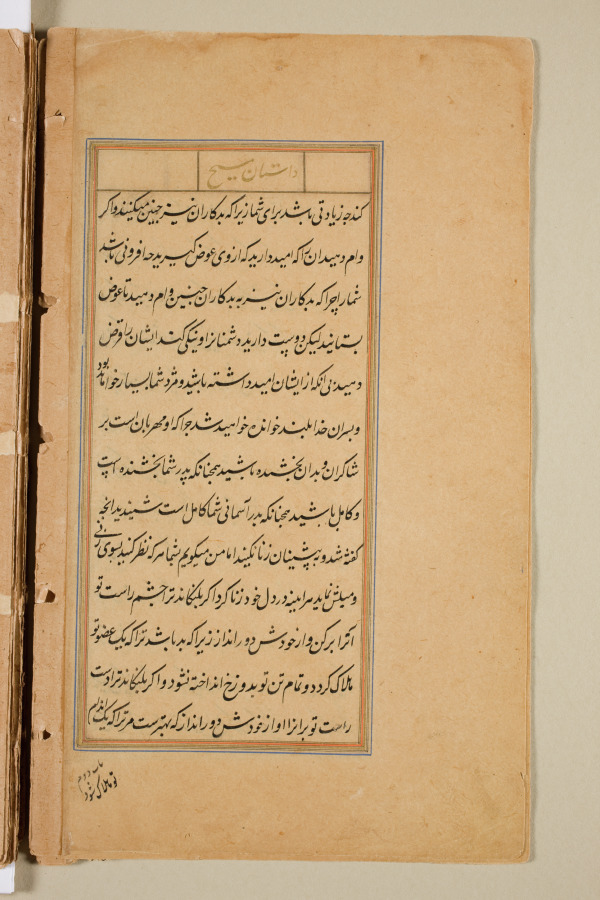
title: Text page from a Mirror of Holiness (Mir’at al-quds) of Father Jerome Xavier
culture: Mughal India, Allahabad, made for Prince Salim (1569–1627)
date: 1602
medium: Ink and gold on paper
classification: Manuscript